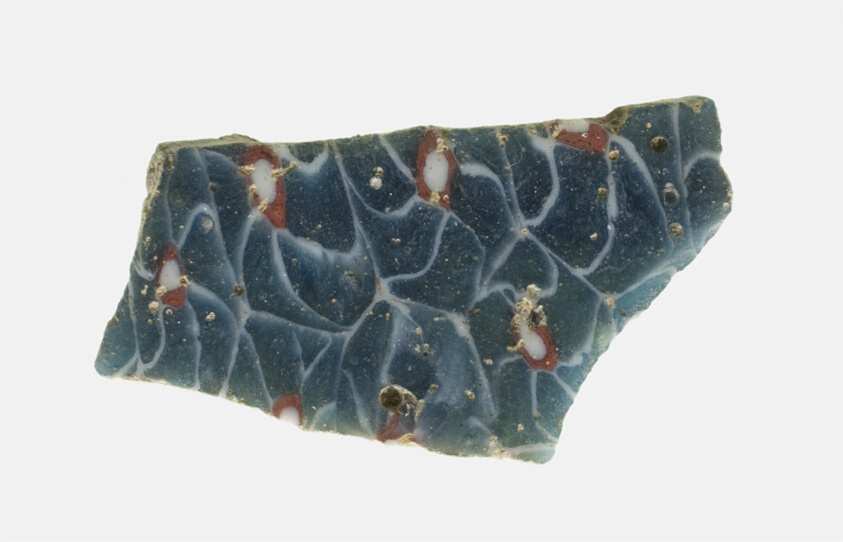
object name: Decorative Arts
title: Fragment of a Bowl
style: ancient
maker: Roman or Eastern Mediterranean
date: 1st century BCE–1st century CE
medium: Glass, mosaic technique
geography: Roman Empire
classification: fragment; decorative arts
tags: decoration